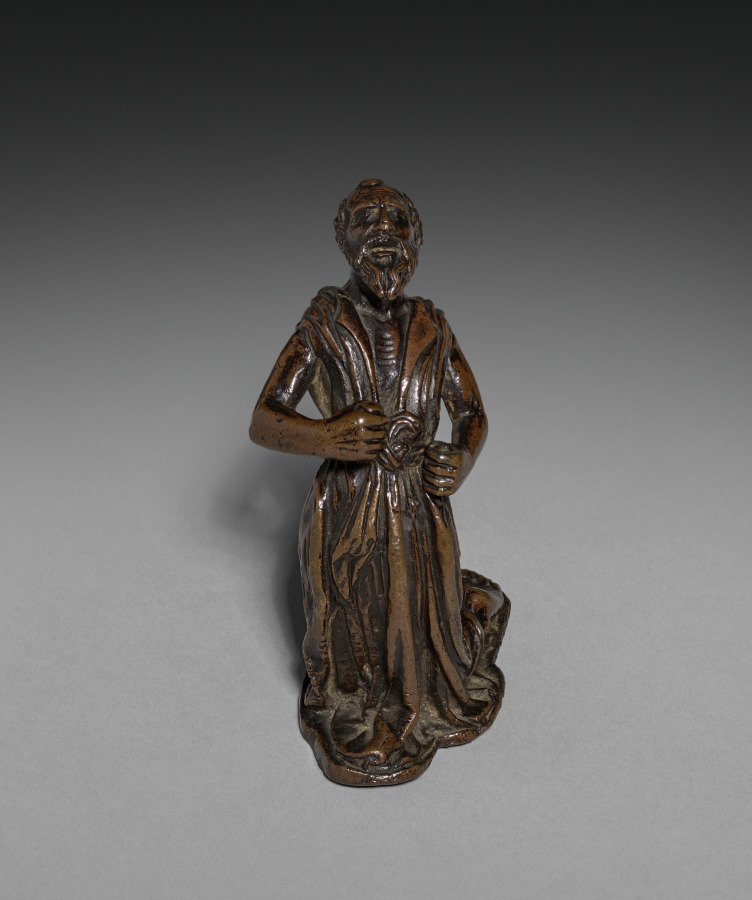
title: Kneeling Saint Jerome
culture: Italy, Ravenna, 16th century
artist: workshop of Severo da Ravenna (Italian, c.1496–c.1543)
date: c, 1525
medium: bronze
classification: Sculpture